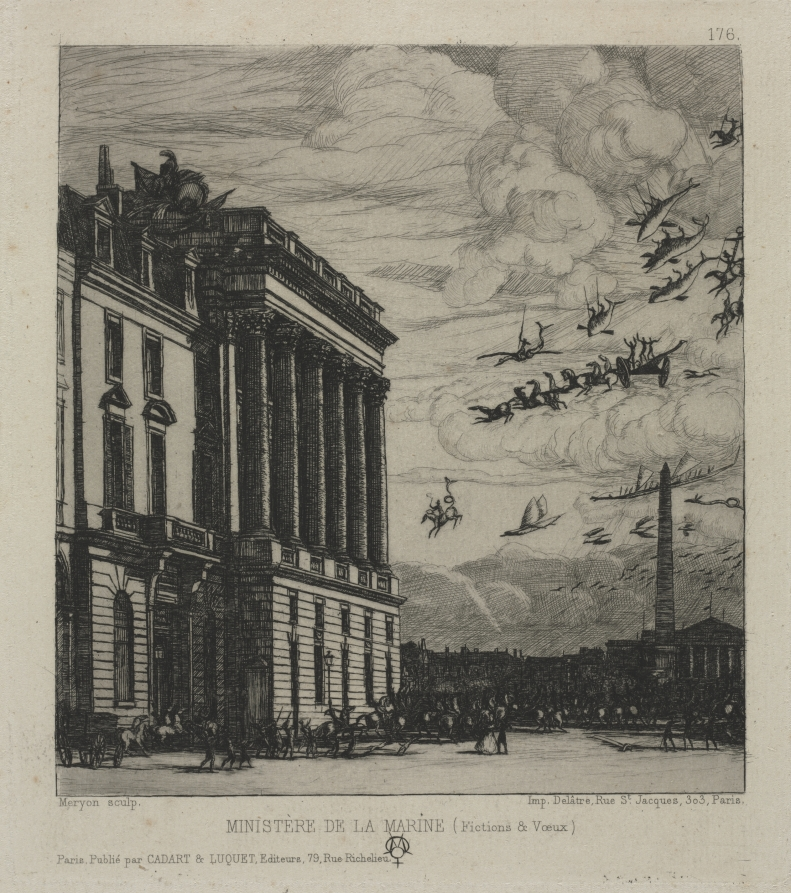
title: The Admiralty, Paris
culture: France, 19th century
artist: Charles Meryon (French, 1821–1868)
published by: Cadart & Luquet for the Société des Aqua-fortistes, 4e Année, August 1, 1866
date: 1865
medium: etching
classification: Print